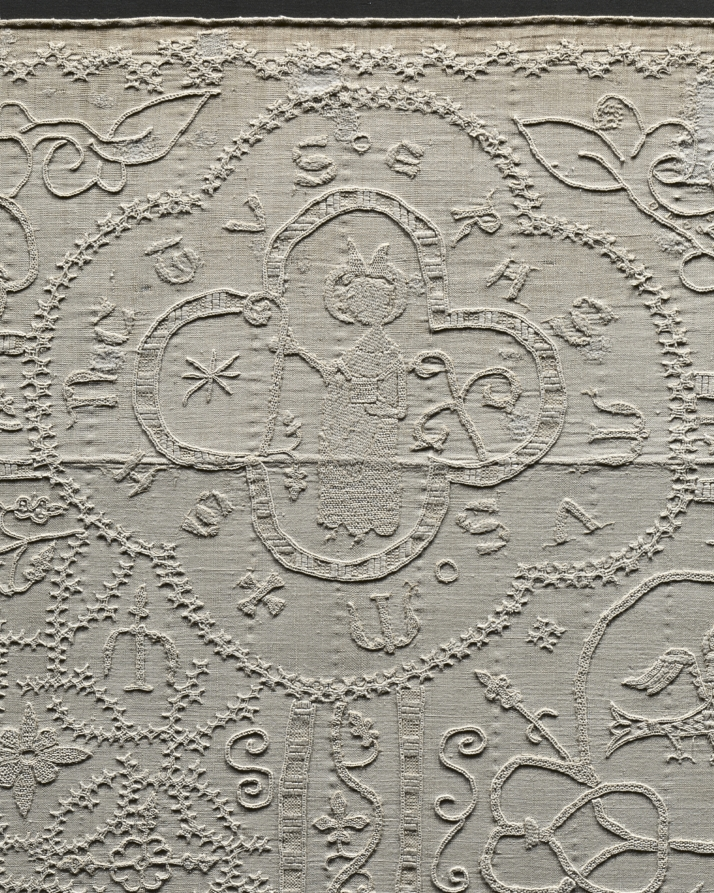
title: Altar Cloth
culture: Germany, Altenberg on the Lahn, Premonstratensian Convent, 14th century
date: c. 1350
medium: embroidery: linen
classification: Embroidery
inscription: various motifs enclosed in quatrefoils with identifying inscriptions in Gothic letters.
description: This large, embroidered altar cloth is one of the rarest, most important medieval church furnishings in existence. It was stitched by nuns in the Premonstratensian Convent in Altenberg on the Lahn River, north of Frankfurt, Germany, and was used to cover the church’s high altar in the weeks leading up to Easter. The cloth is an example of linen embroidery, a specialty of German nuns in the later Middle Ages. The Altenberg monastery church once had valuable furnishings; the high altar retable (a decorated frame with sculptures and paintings on the top of an altar) has survived, the main parts of which are now in the Städel Museum in Frankfurt, Germany.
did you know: When lit from behind, the previously hidden details emerge and the complex design becomes evident.